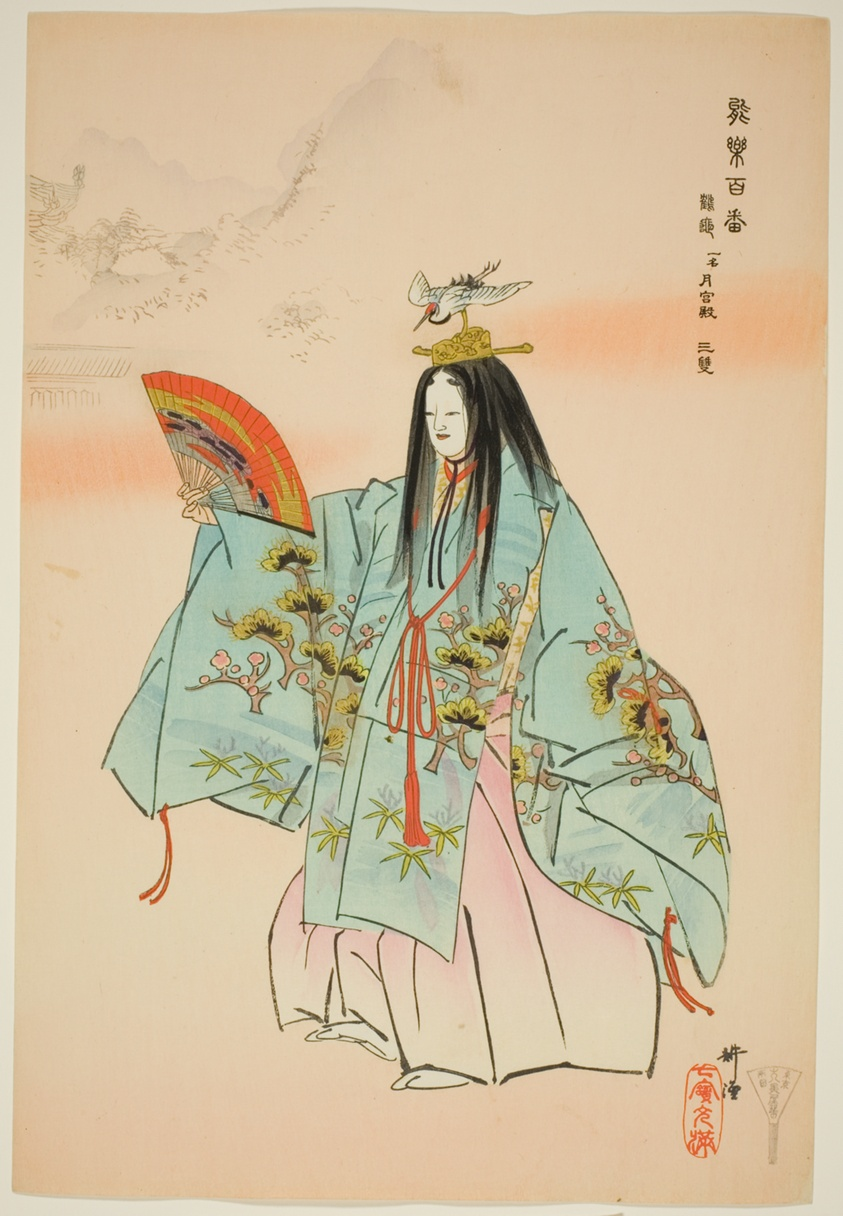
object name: Print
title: Tsuru-kame, from the series "One Hundred No Dramas (Nogaku hyakuban)"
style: Japanese (culture or style)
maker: Tsukioka Kogyo; Japanese, 1869-1927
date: 1898/1903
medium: Color woodblock print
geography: Japan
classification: woodblock print; print; asian art